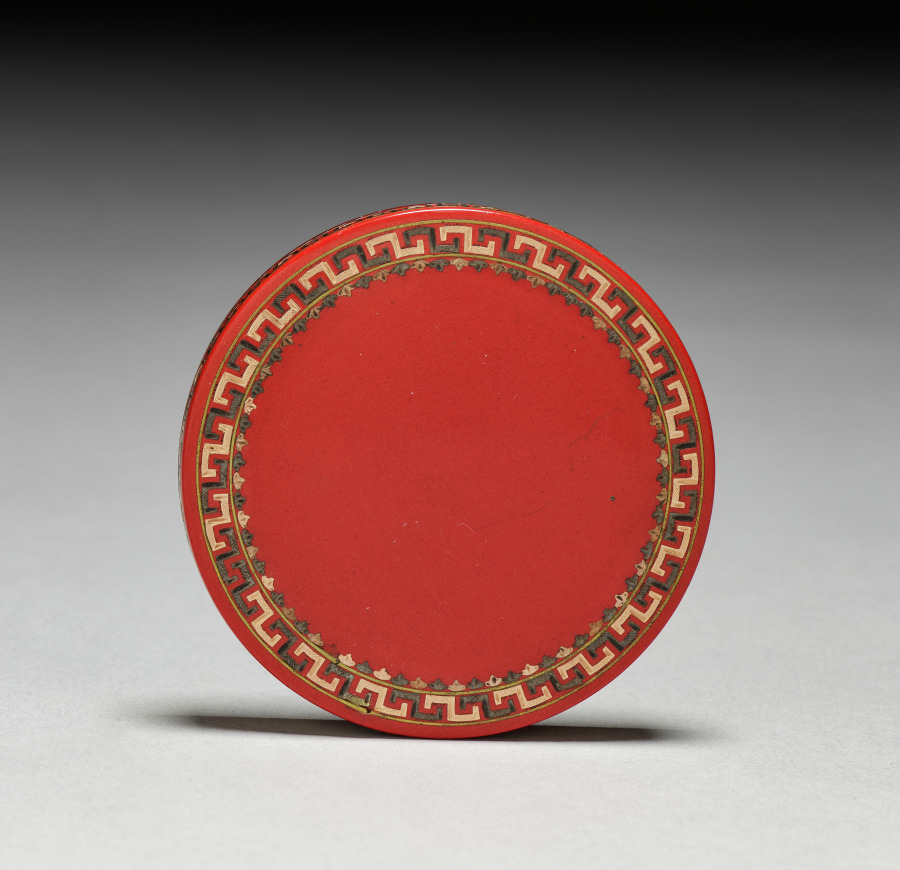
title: Lid for a Round Box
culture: France, 18th century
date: c. 1760–70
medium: Tortoiseshell with red lacquer; inlays of gold, silver, and brass wire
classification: Miscellaneous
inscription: miniature inscribed: annee [?]/1767.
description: This small lacquer box, made in France during the 1700s, references China in that it imitates Chinese material and craftmanship such as red lacquer and celadon. This round box with an inlaid key pattern (an interlocking geometric motif ), emulates the bright vermilion color of Chinese red lacquer, typical of Suzhou lacquer ware. The key pattern is reminiscent of the so-called Chinese thunder pattern (leiwen).